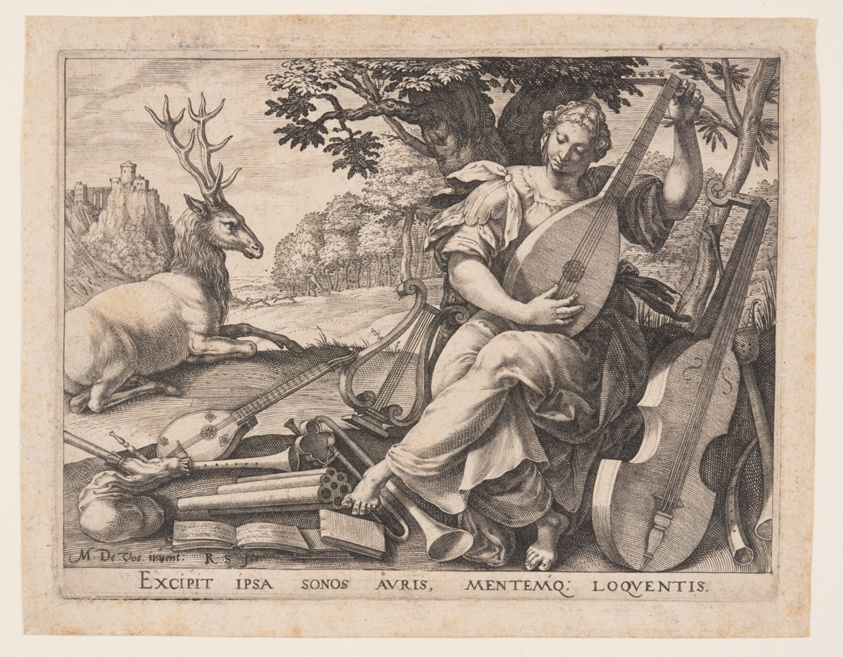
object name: Print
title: Hearing, from The Five Senses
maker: Raphael Sadeler I (Flemish, 1560/61–1628/32); after Maarten de Vos (Flemish, 1532–1603)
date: 1581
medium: Engraving on paper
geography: Flanders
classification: engraving; paper; print; prints and drawing